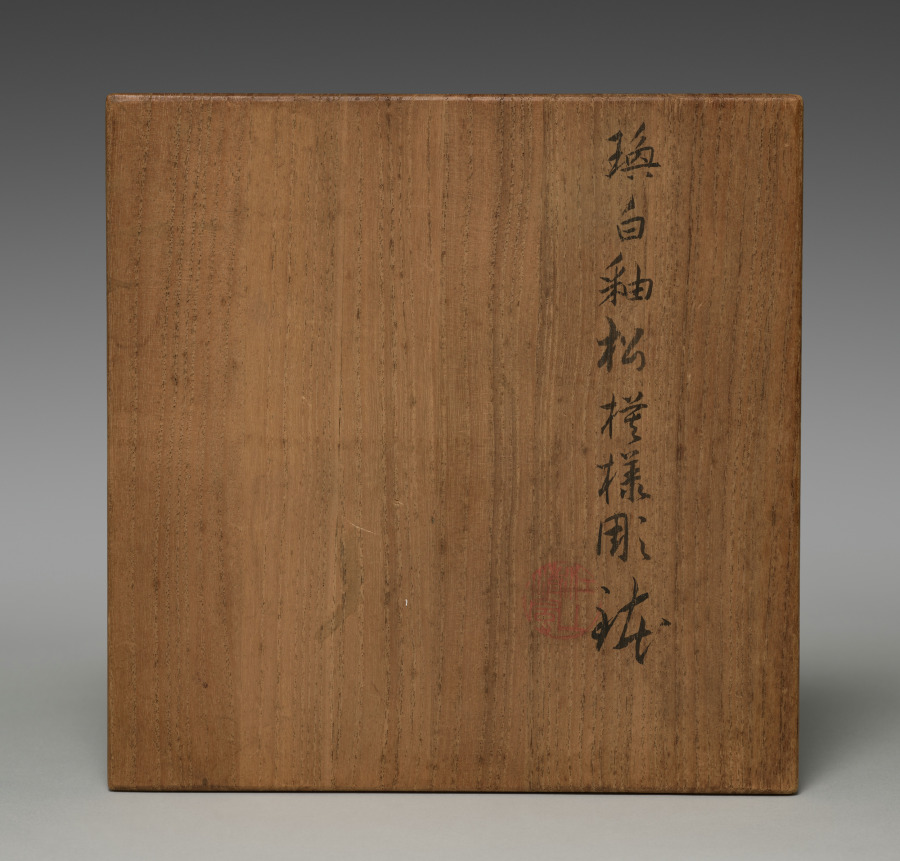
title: Bowl with Old Pine and Poem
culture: Japan, Taishō period (1912–26) or Shōwa period (1926–89)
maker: Seifū Yohei IV (Japanese, 1872–1951)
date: 1914–46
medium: Porcelain with molded and carved design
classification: Ceramic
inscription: 鶴樹君子風拂太平枝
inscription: 清風造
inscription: 清風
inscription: 成山清風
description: A grand, aged pine is carved into the body of this bowl. The inscription on the reverse side explains the tree’s presence. It is an altered version of two lines from a poem by Li Jiao (646?–715?) called “Pine.” Li Jiao was a senior government official who had a tumultuous career under the reign of Wu Zetian (r. 690–705), as well as those of her sons and grandson during the Tang dynasty (618–907). Although little known today, his work was read in Japan during the Heian (794–1185) and Kamakura periods (1185–1333). An anthology containing his poems, which was lost in China, was passed down across the generations in Japan. The translation of the inscription is as follows (the original characters, written and read from right to left, are shown below from left to right): The crane nests in the mastwood tree, the wind flicks at its peaceful branches. 鶴樹君子風拂太平枝 The mastwood is a pine-like evergreen, and the crane sheltering there is protected from the wind. In the original poem, the characters before “branches” (枝) are rather 大夫, meaning “high official.” This is likely a reference to the title bestowed upon a pine tree by the emperor Qin Shi Huang (r. 221–210 BCE) in thanks for its protection when a fierce rain fell as he ascended Mount Tai to pay his obeisance to the heavens.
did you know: The box inscription identifies the bowl's glaze as kanpakuyū, "bright-jewel white glaze."